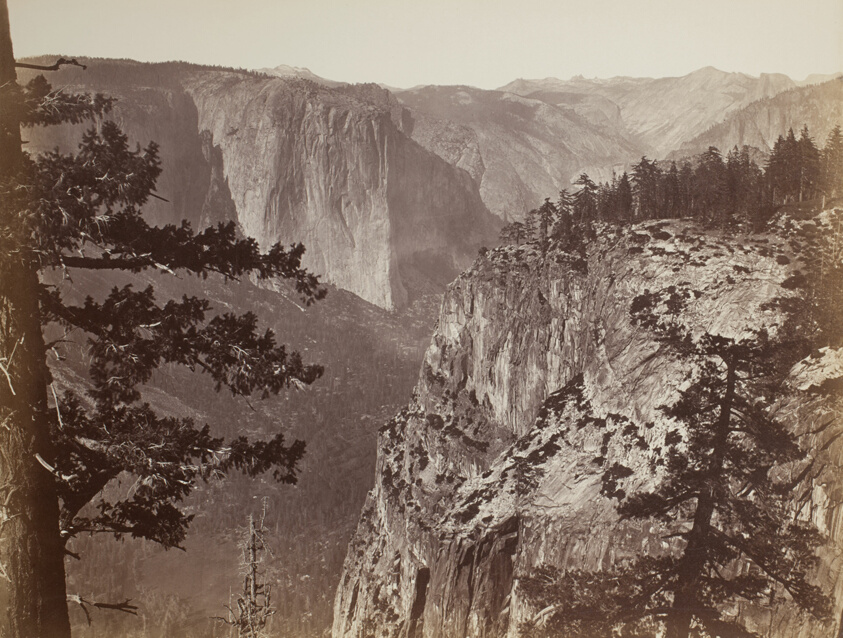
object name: Photograph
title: First View of the Yosemite Valley from the Mariposa Trail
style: 19th century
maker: Carleton E. Watkins; American, 1829-1916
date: 1865/66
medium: Albumen print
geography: United States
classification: albumen silver print; photographic process; photography; photograph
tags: traditional landscapes, photography, landscapes